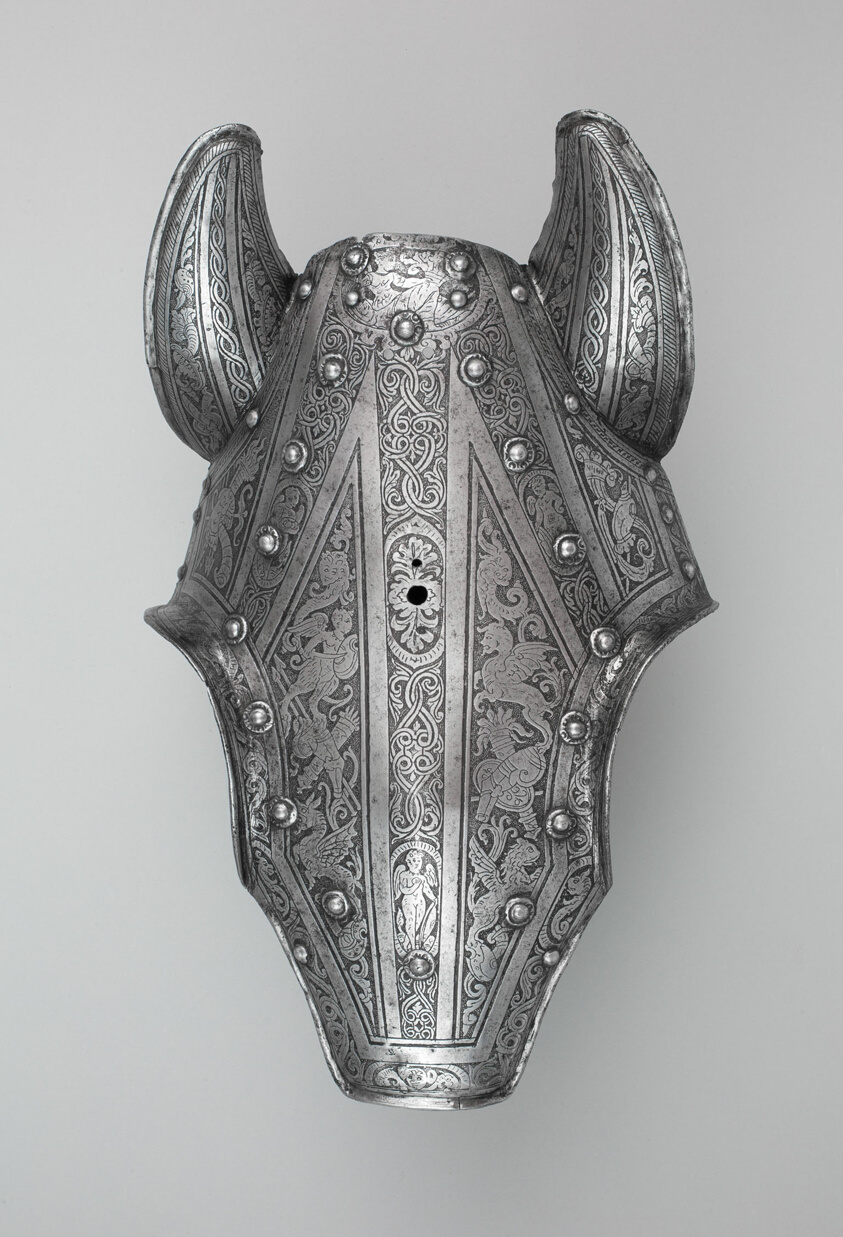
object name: Armor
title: Demi Shaffron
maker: Italian, Milan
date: 1590/1600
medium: Steel and leather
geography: Milan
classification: horse equipment; armor; arms and armor